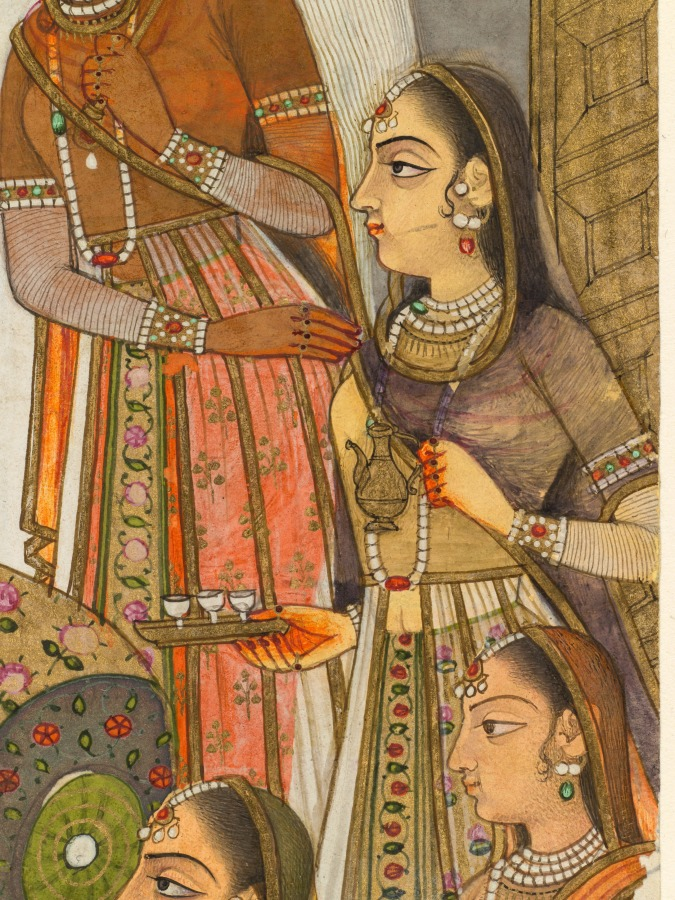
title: A princess with attendants on a terrace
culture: India, Hyderabad, Deccan, 18th century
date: c. 1720–1730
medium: Gum tempera and gold on paper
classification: Painting